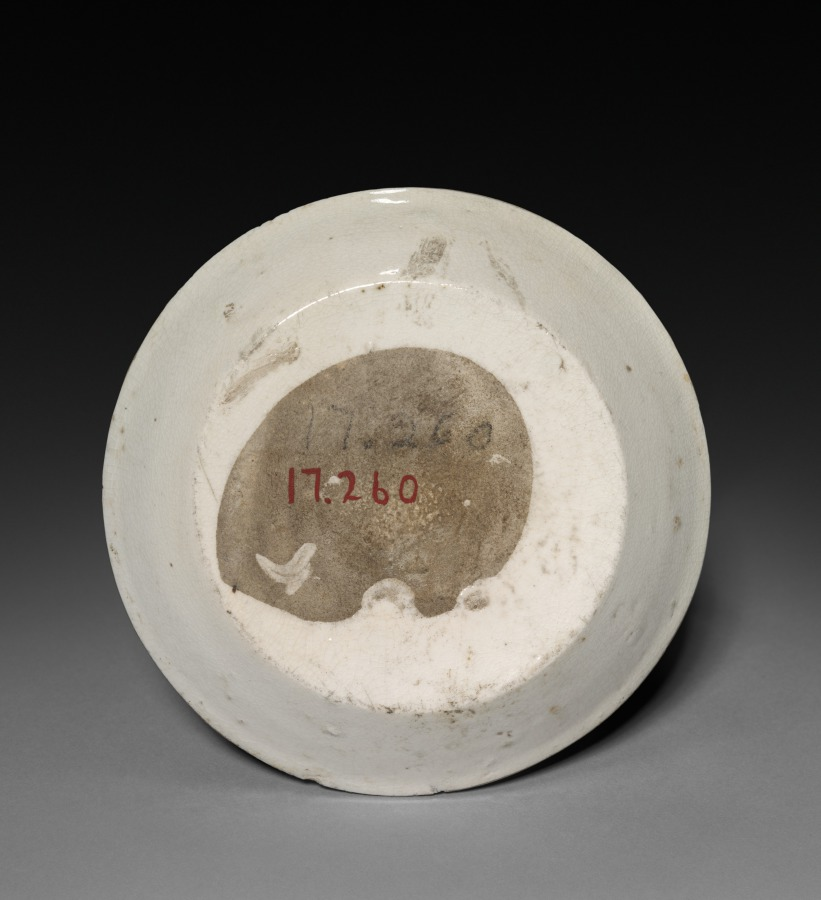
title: Saucer: Ding ware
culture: China, Jin dynasty (1115-1234) - Yuan dynasty (1271-1368)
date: 1100s-1200s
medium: porcelain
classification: Ceramic